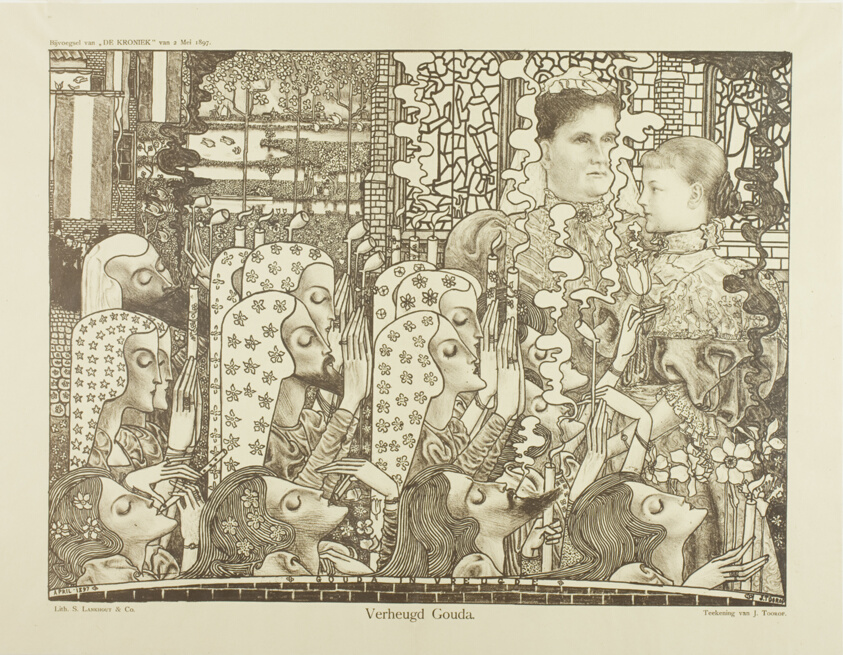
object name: Print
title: Happy Gouda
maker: Jan Toorop (Dutch, 1858-1928); printed by S. Lankhout and Company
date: drawn April 1897 and published May 2, 1897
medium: Lithograph in brown on cream wove paper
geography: Netherlands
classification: lithograph; print; prints and drawing